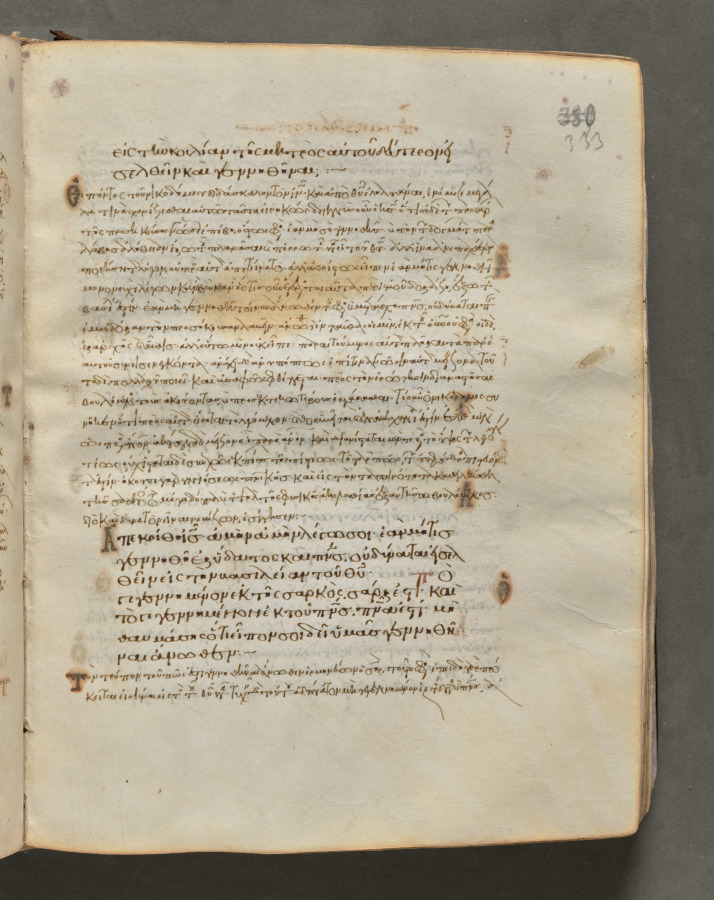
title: Text, folio 333 (recto), from a Gospel Book with Commentaries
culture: Byzantium, Constantinople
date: c. 1000–1100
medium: ink, tempera, and gold on vellum; leather binding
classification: Bound Volume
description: Each of the four gospels in this book opens on a page with brilliantly illuminated borders depicting the author of the text as well as birds—principally peacocks, symbols of the immortality of the soul—and fountains, representing the fountain of life and the salvation of the soul. This volume consists of 428 leaves with texts in Greek. Its level of sophistication suggests that it was probably written and decorated in a monastery in Constantinople.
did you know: Gospel books were carried in procession through Byzantine churches.